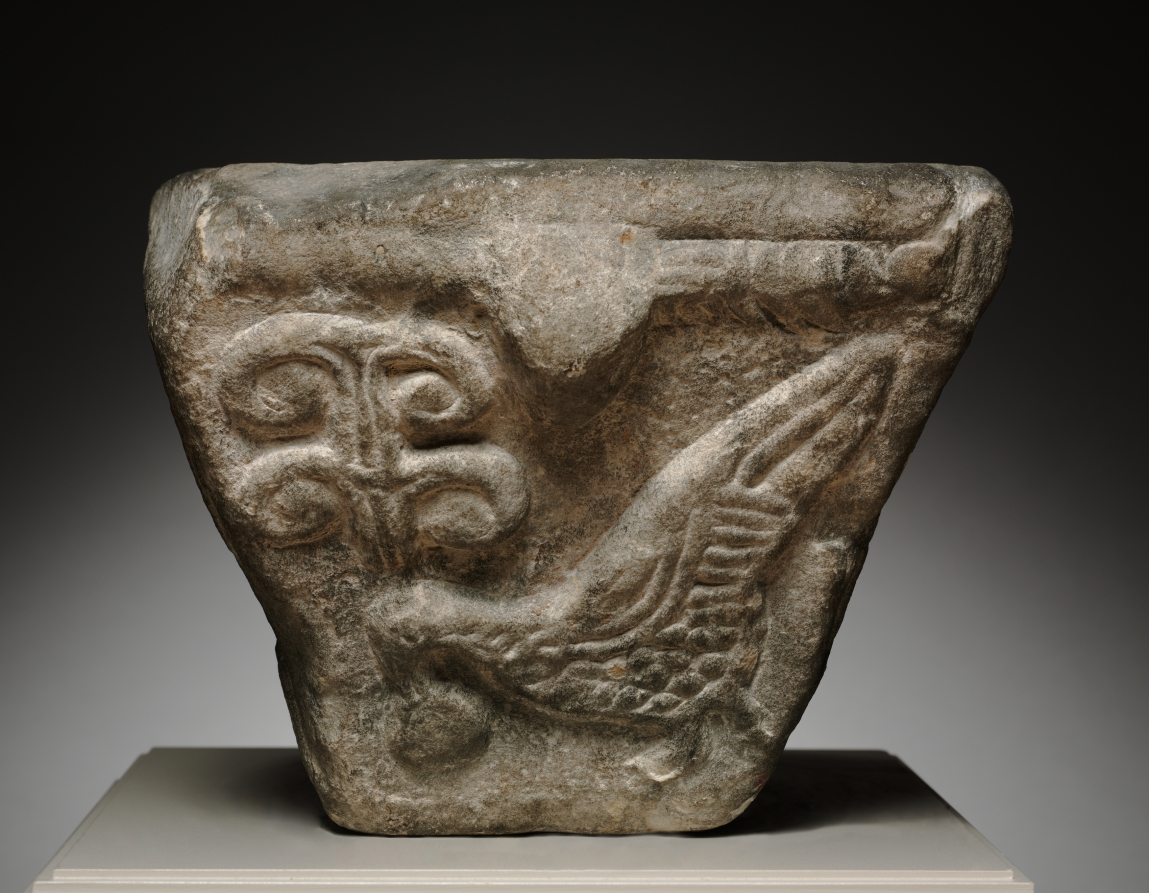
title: Capital with Birds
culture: Italy, Migration period, 8th-9th Century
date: 700s-800s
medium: marble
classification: Sculpture